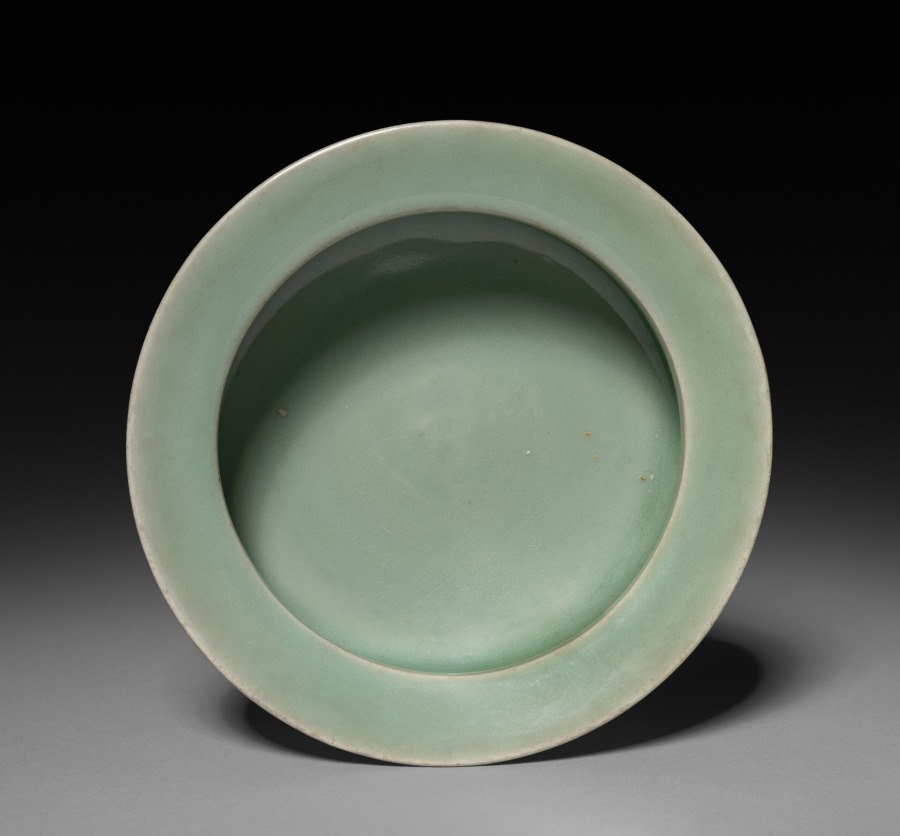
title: Brush Washer: Longquan Ware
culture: China, Southern Song dynasty (1127-1279)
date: 13th Century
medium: glazed porcelain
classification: Ceramic